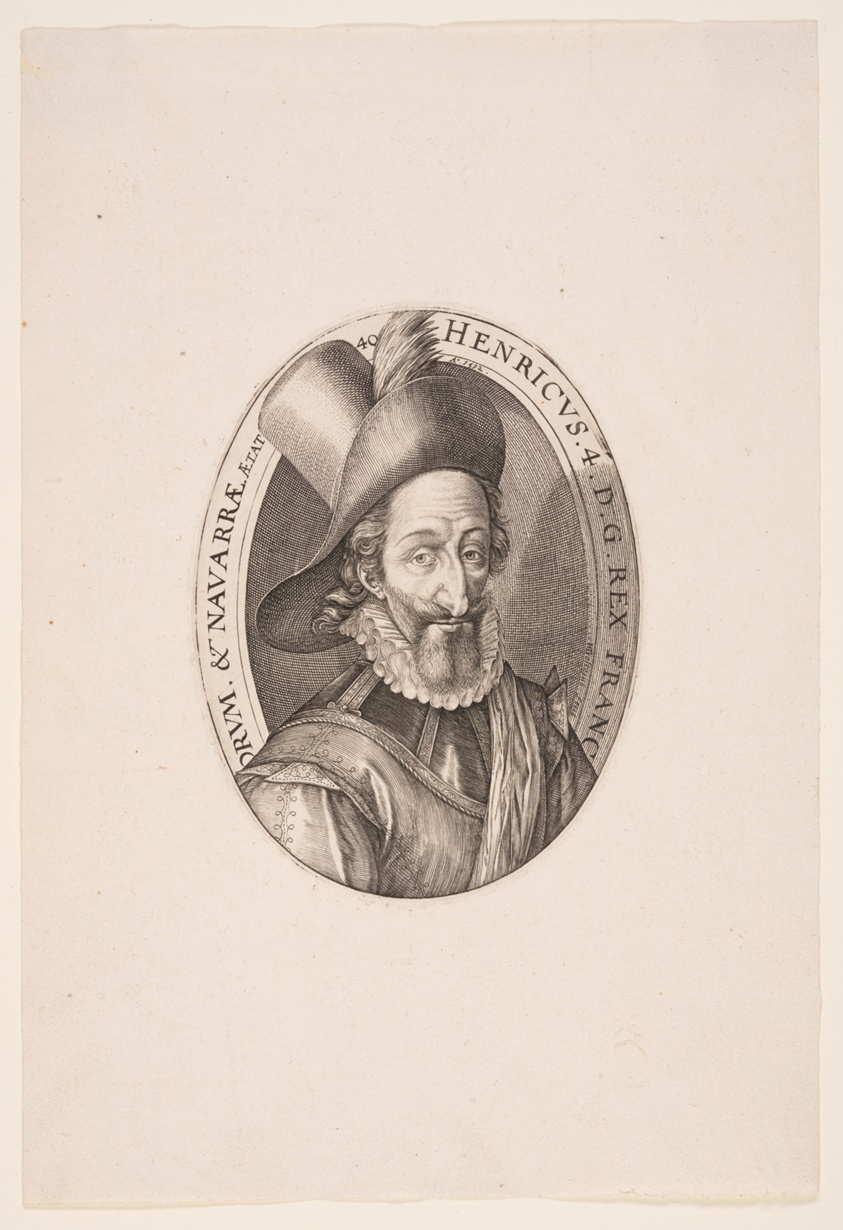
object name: Print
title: Henry IV, King of France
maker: Hendrick Goltzius (Dutch, 1558–1617)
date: 1592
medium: Engraving on laid paper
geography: Netherlands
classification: engraving; paper; print; prints and drawing